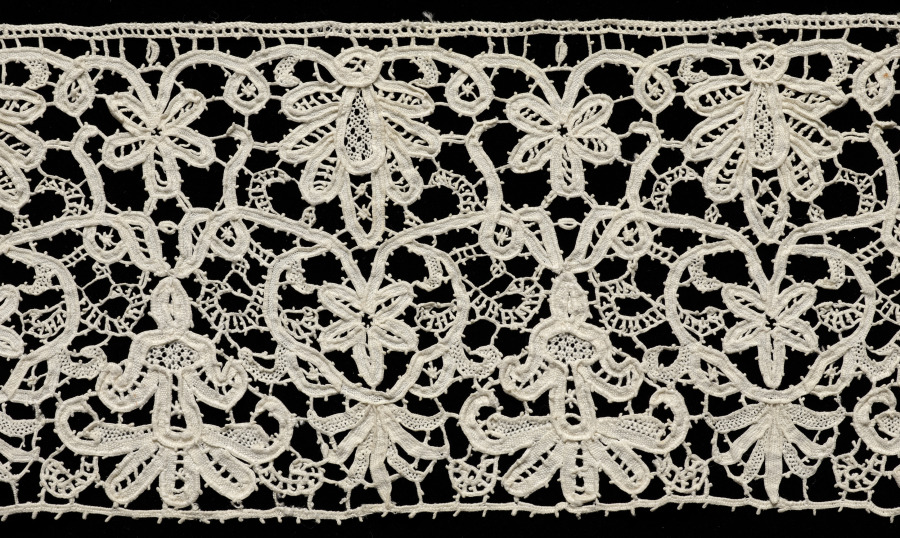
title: Lace Edging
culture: Italy, Venice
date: 1600s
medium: Needle lace (mezzo punto) and bobbin lace (tape lace)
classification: Lace